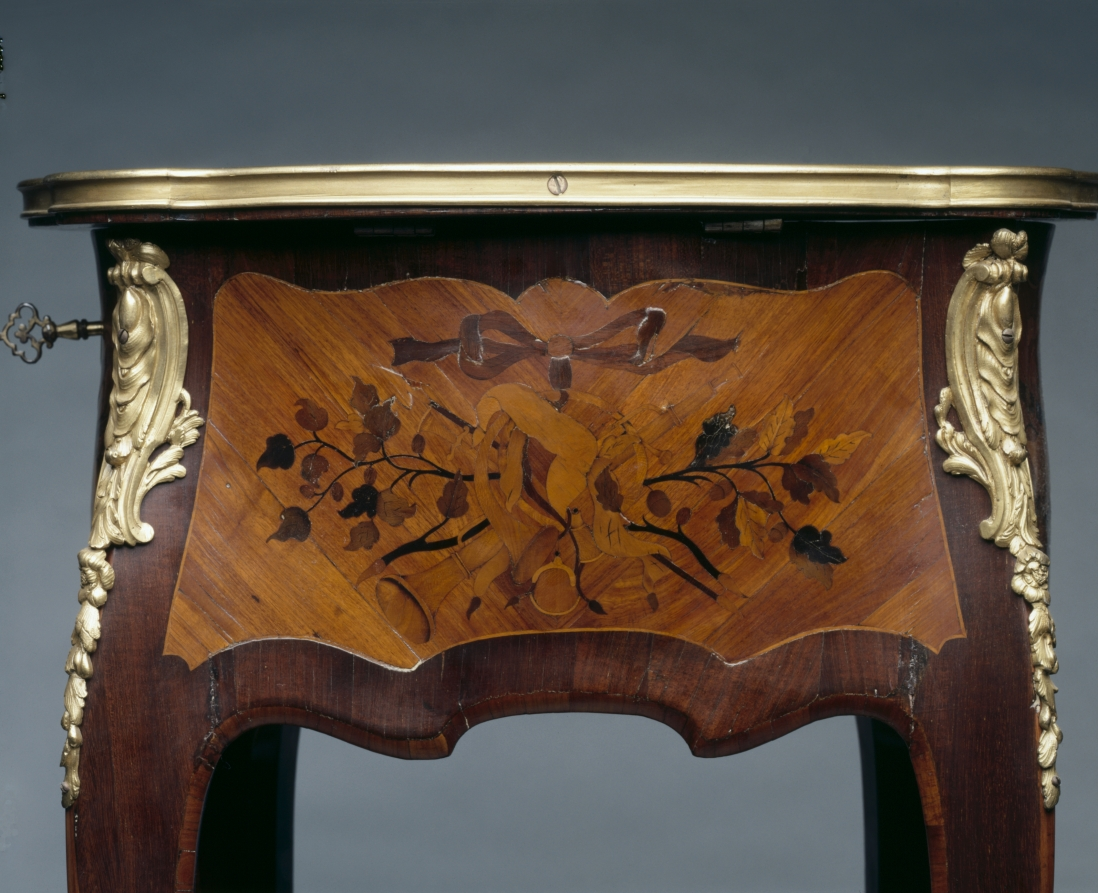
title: Work Table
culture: France, Paris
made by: Bernard Peridiez (French, d. 1757)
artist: or Gerard Peridiez (French, born c.1730)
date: 1700–1799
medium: wood marquetry with gilt bronze mounts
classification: Furniture and woodwork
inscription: signed under shelf: B. Peridiez JNE.